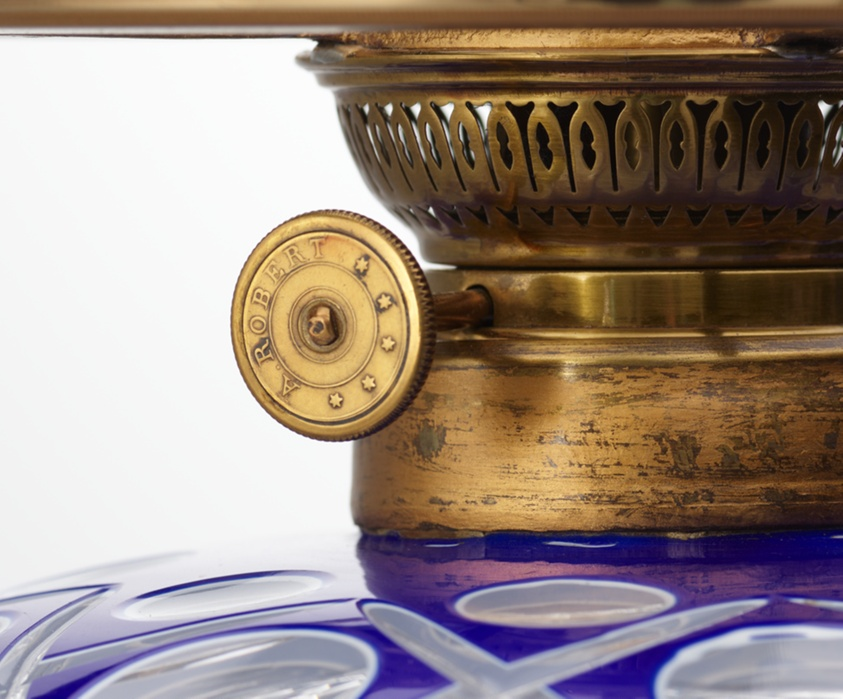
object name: Glass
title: Double-Plated Lamp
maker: Boston and Sandwich Glass Company (American, 1825–1888); Sandwich, Massachusetts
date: c. 1865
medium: Cobalt blue, opaque white, and clear glass, gilt bronze, and marble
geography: Sandwich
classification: lamp (lighting device); glass; american decorative arts; american arts; decorative arts